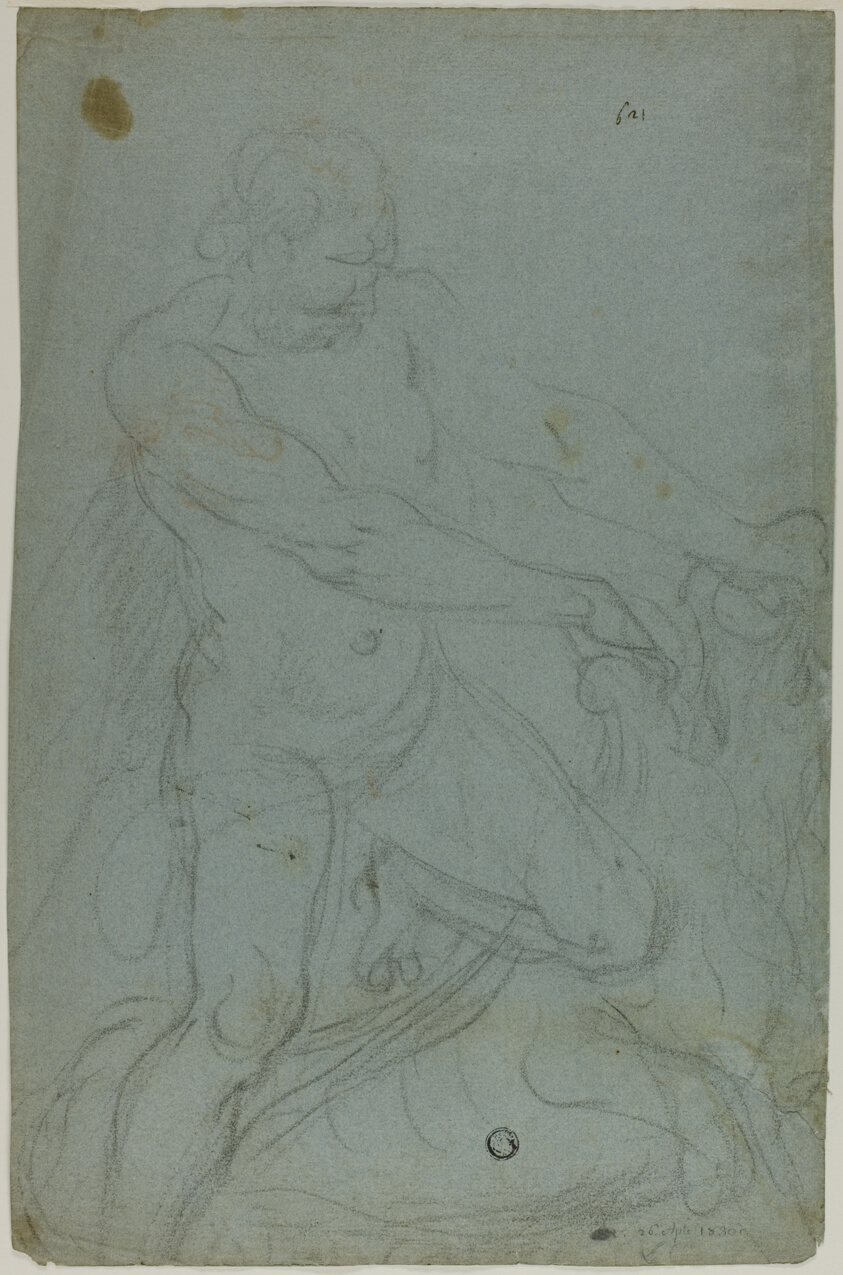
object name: Drawing and Watercolor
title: Samson and the Lion (recto); Virgin Mary with Right Arm Extended (verso)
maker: Probably Domenico Fiasella (Italian, 1589-1669); or possibly Lodovico Carracci (Italian, 1555-1619); or possibly a follower of Cesare Dandini (Italian 1596-1657)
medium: Black chalk (recto), and black chalk heightened with touches of white chalk (verso), on blue laid paper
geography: Italy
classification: drawings (visual works); prints and drawing